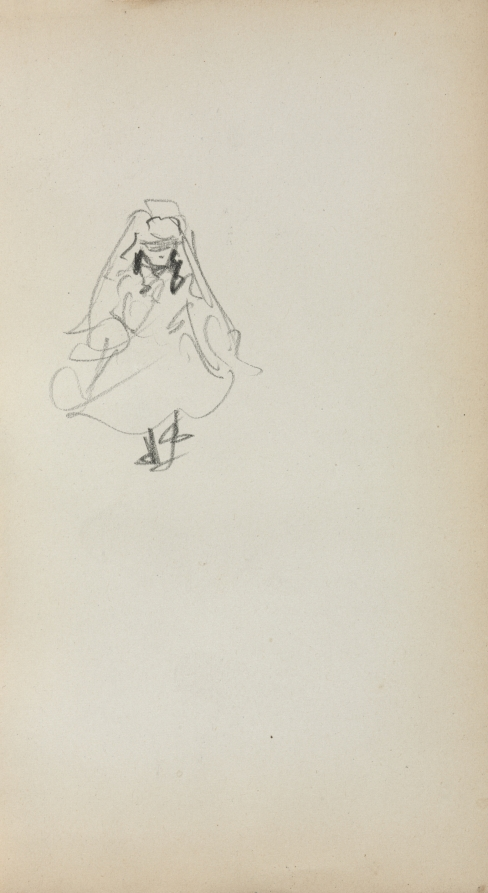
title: Italian Sketchbook: Standing Girl (page 257)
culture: America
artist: Maurice Prendergast (American, born Newfoundland [now Canada], 1858–1924)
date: 1898–1899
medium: pencil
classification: Bound Volume